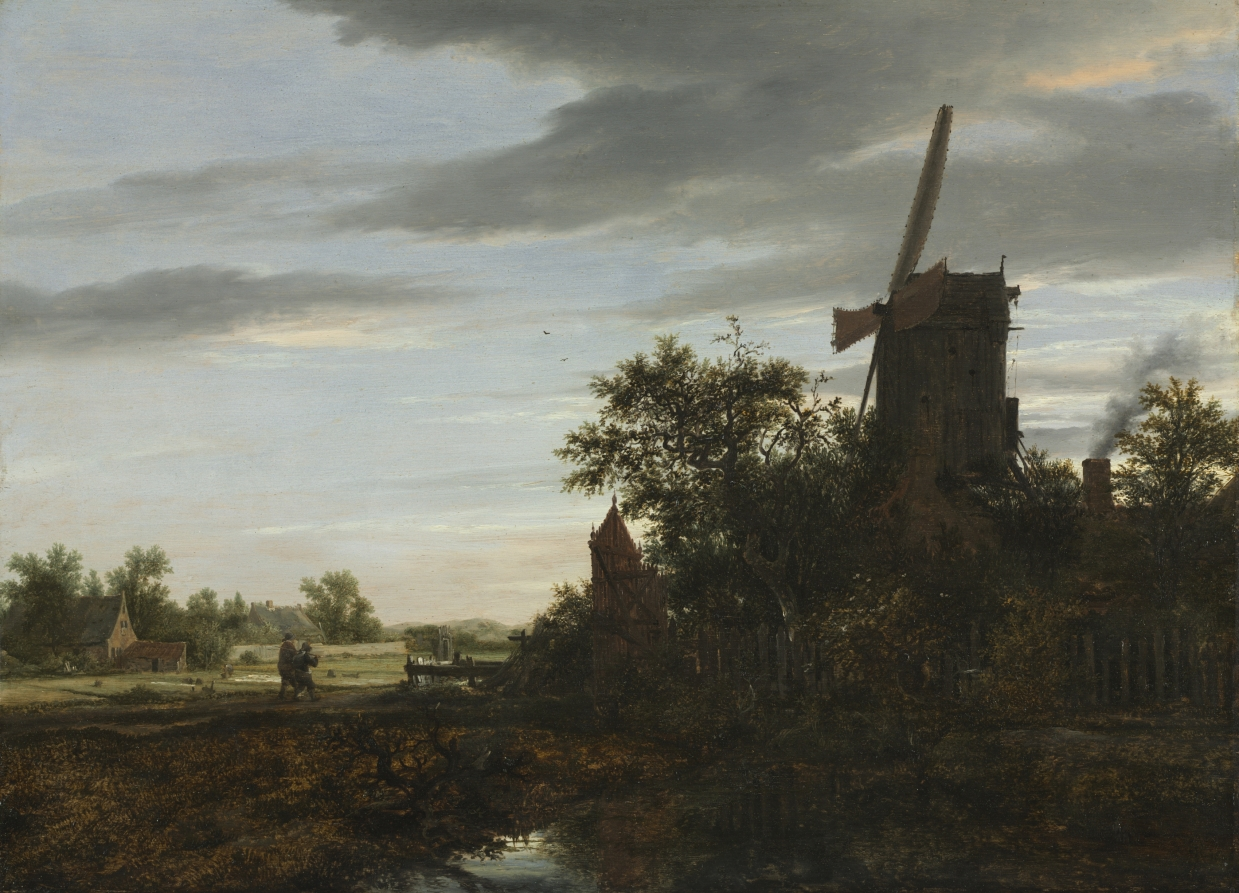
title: Landscape with a Windmill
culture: Netherlands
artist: Jacob van Ruisdael (Dutch, 1628/29–1682)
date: 1646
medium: oil on wood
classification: Painting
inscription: Signed lower right: "JvR 1646 [JvR in monogram]"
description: Even this early work by Jacob van Ruisdael—painted while he was still a teenager—shows his unique approach to landscape that made the simplest motifs seem grand and heroic. Dark forms are massed in the foreground, creating a stark contrast to the expansive, sunlit plain at left.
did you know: Look closely at the field across from the windmill: white linens are naturally bleached in the sun, a process that would have taken several months.